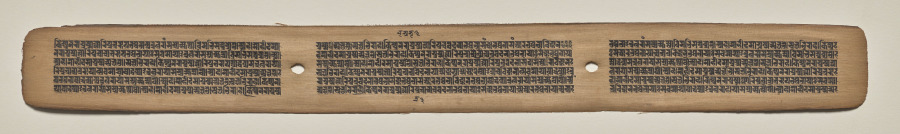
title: Text, Folio 112 (recto), from a Manuscript of the Perfection of Wisdom in Eight Thousand Lines (Ashtasahasrika Prajnaparamita-sutra)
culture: Eastern India, Bihar, Vikramashila Monastery. Painting: Nepal, Kathmandu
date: Sunday, September 14, 1119 (year 239 of the Newar Samvat in the month of Ashvina)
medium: gum tempera and ink on palm leaves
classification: Painting